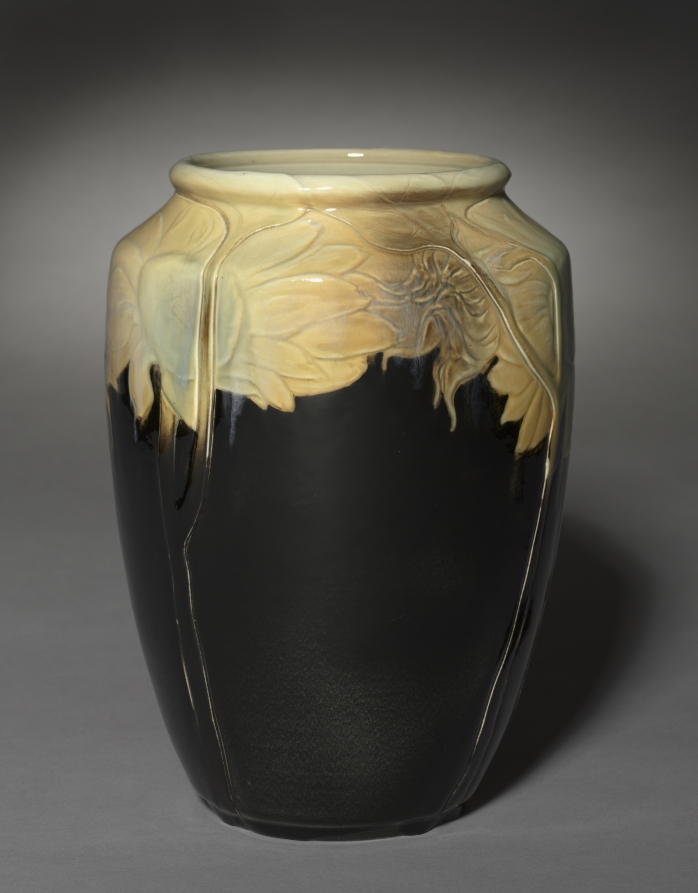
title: Vase Decorated with Sunflowers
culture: America, late 19th Century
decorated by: John D. Wareham (American, 1871–1954)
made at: Rookwood Pottery Company (American, established 1880)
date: 1899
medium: earthenware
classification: Ceramic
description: Floral and animal motifs are common decoration found on vessels designed by John D. Wareham for the Cincinnati-based Rookwood Pottery Company. Here, bright yellow sunflowers around the mouth of the vase are enhanced by stark black.